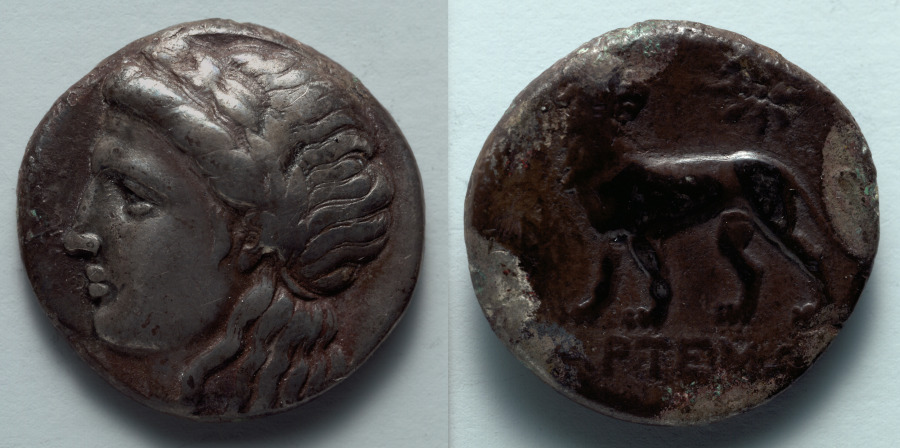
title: Tetradrachm: Head of Apollo (obverse); Lion (reverse)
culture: Greek, minted at Miletos (Ionia)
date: c. 334–323 BCE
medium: silver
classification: Coins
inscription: ΑΡΤΕΜΩ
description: The lion, king of the beasts and an animal associated with regal and heroic power, featured prominently on the coinage of many ancient Greek city-states. Artists placed the lion in a variety of poses, sometimes including the whole body, at other times the foreparts or just the head. Although it may once have roamed nearby, for many Greeks the lion was a monster nearly as exotic as the Chimaera, of which it formed a part, together with a goat head and snake-headed tail.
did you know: The lion and star on the reverse connect to the sun god, Apollo, on the obverse.